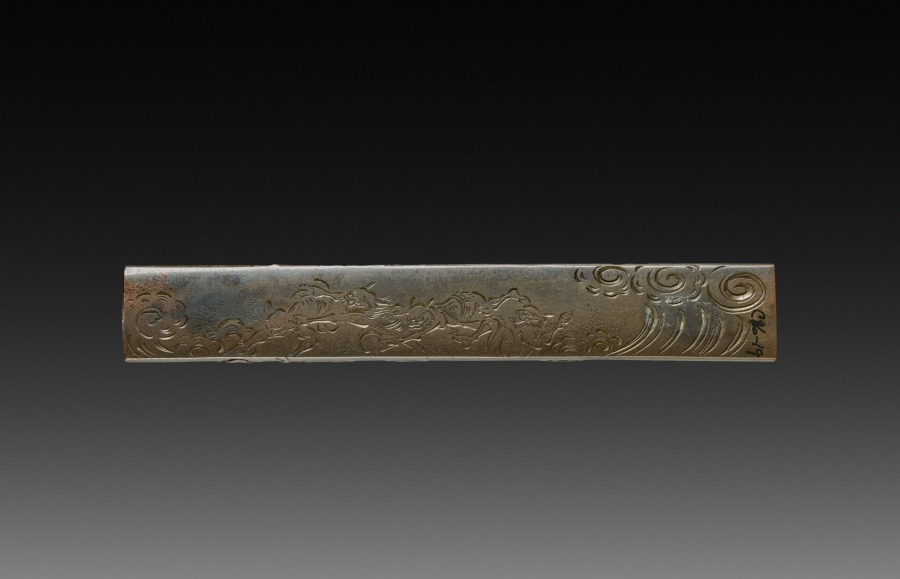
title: Knife Handle (Kozuka)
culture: Japan, Edo period (1615–1868)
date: early to mid-1800s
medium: inlaid bronze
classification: Metalwork